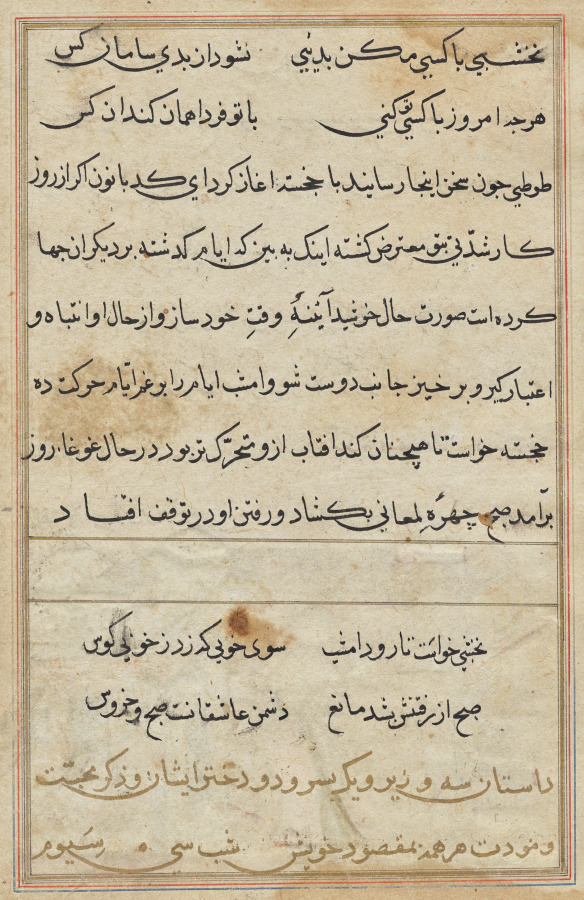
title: Page from Tales of a Parrot (Tuti-nama): text page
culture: Mughal India, court of Akbar (reigned 1556–1605)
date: c. 1560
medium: gum tempera, ink, and gold on paper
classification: Painting